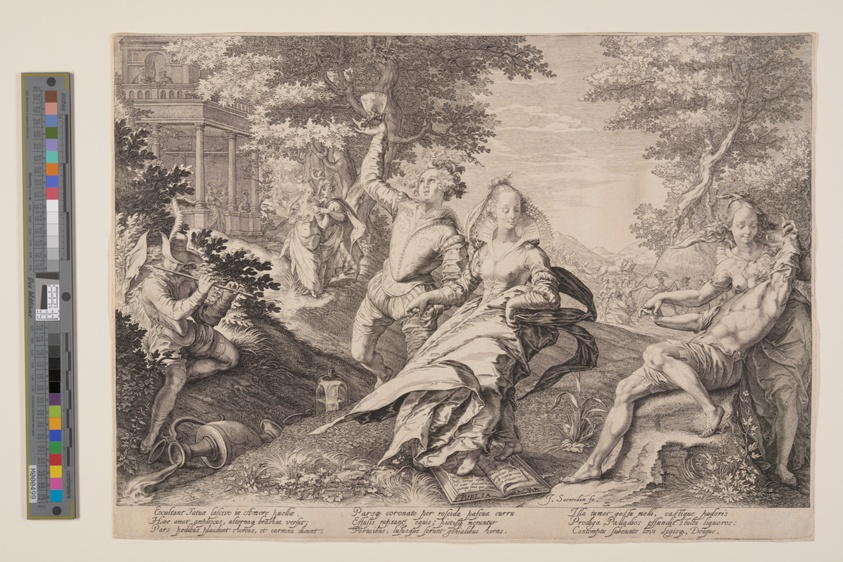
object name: Print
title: Foolish Virgins Revelling, from Parable of the Wise and Foolish Virgins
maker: Jan Saenredam (Dutch, 1565–1607)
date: 1606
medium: Engraving on ivory laid paper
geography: Netherlands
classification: engraving; paper; print; prints and drawing